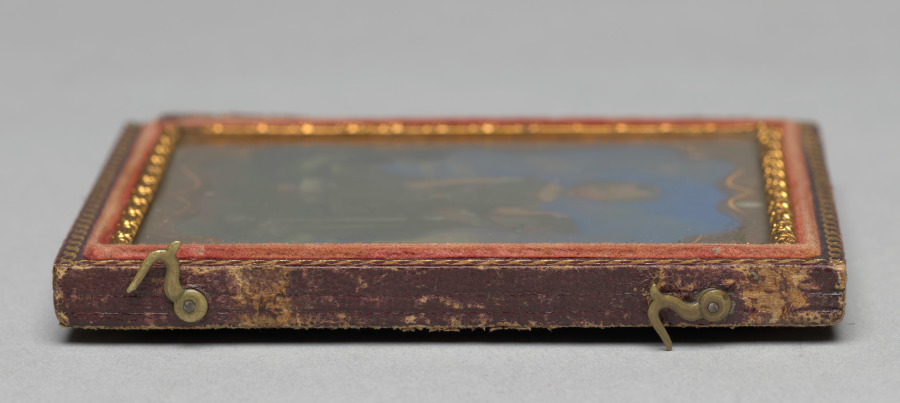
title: Boy with hobby horse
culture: America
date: c. 1862–65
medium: ambrotype, tinted, sixth plate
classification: Photograph